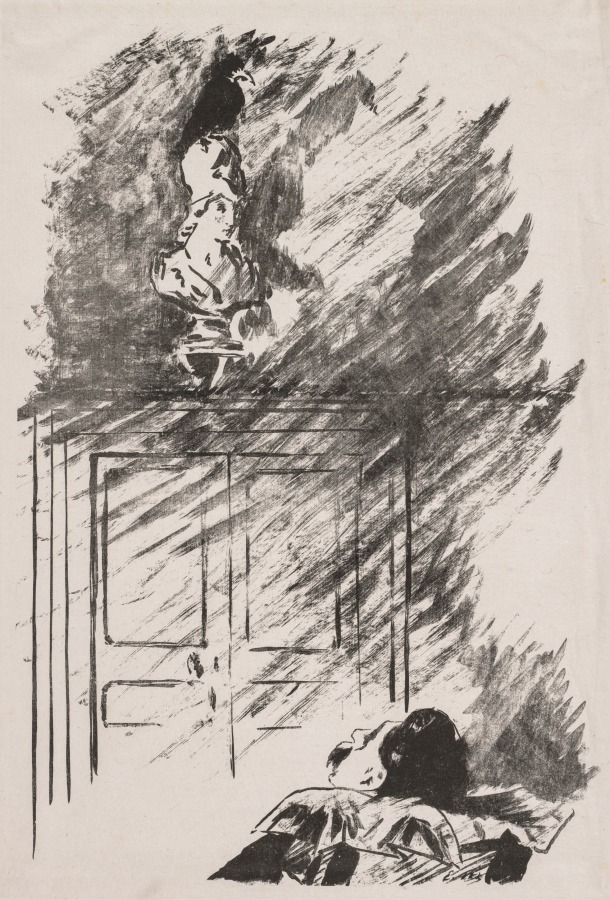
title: Perched upon a Bust of Pallas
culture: France, 19th century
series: Illustration for "The Raven" by Edgar Allan Poe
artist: Édouard Manet (French, 1832–1883)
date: 1875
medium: lithograph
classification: Print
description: Edouard Manet created this lithograph for his friend Stephane Mallarmé’s 1875 French translation of American writer Edgar Allan Poe’s classic poem “The Raven” (1845) about a man mourning his deceased love who is visited by a raven that repeatedly cries, “Nevermore.” Mallarmé’s edition is considered one of the first modern livres d’artistes—books created specifically as works of visual art. Manet created four full-page illustrations, including the scene in which the raven stares at the narrator from the top of the bust of the goddess Athena, and a raven head design used on the book’s cover and on its advertising poster.